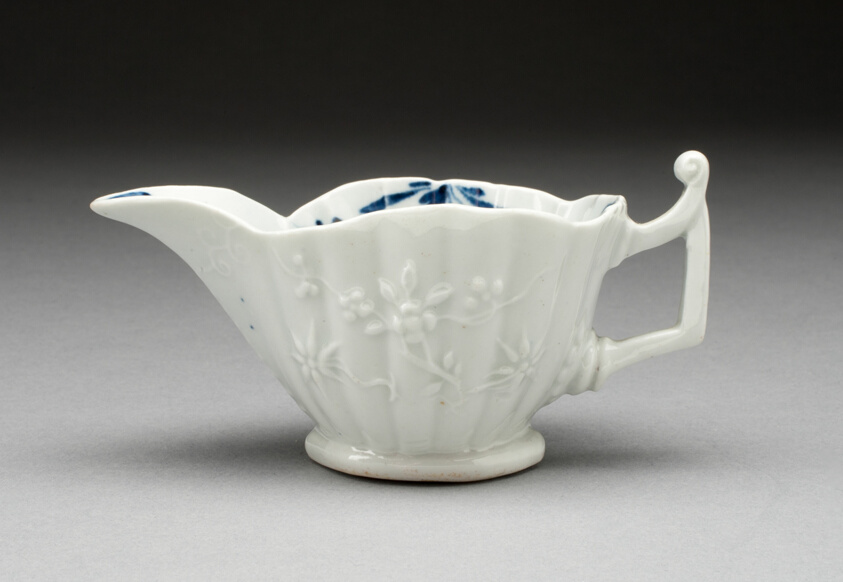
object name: Ceramics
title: Creamer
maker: Worcester Porcelain Factory (Warmstry House Period, 1751–1783); Worcester, England, founded 1751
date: c. 1755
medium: Soft-paste porcelain with underglaze blue decoration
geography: Worcester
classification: ceramics; teaware; porcelain; european decorative arts